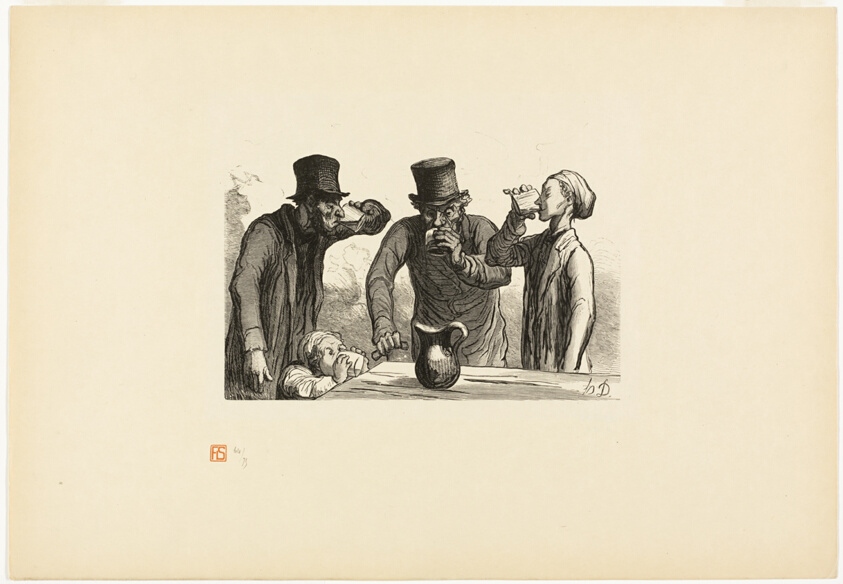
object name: Print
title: Physiology of Drinking: The Four Ages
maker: Charles Maurand (French, 1824-1904); after Honoré Victorin Daumier (French, 1808-1879); printed by François Louis Schmied (Swiss, 1873-1941); published by Jules Meynial (French, 20th century)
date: 1862, printed 1920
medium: Wood engraving on cream Japanese paper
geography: France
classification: wood engraving; print; prints and drawing